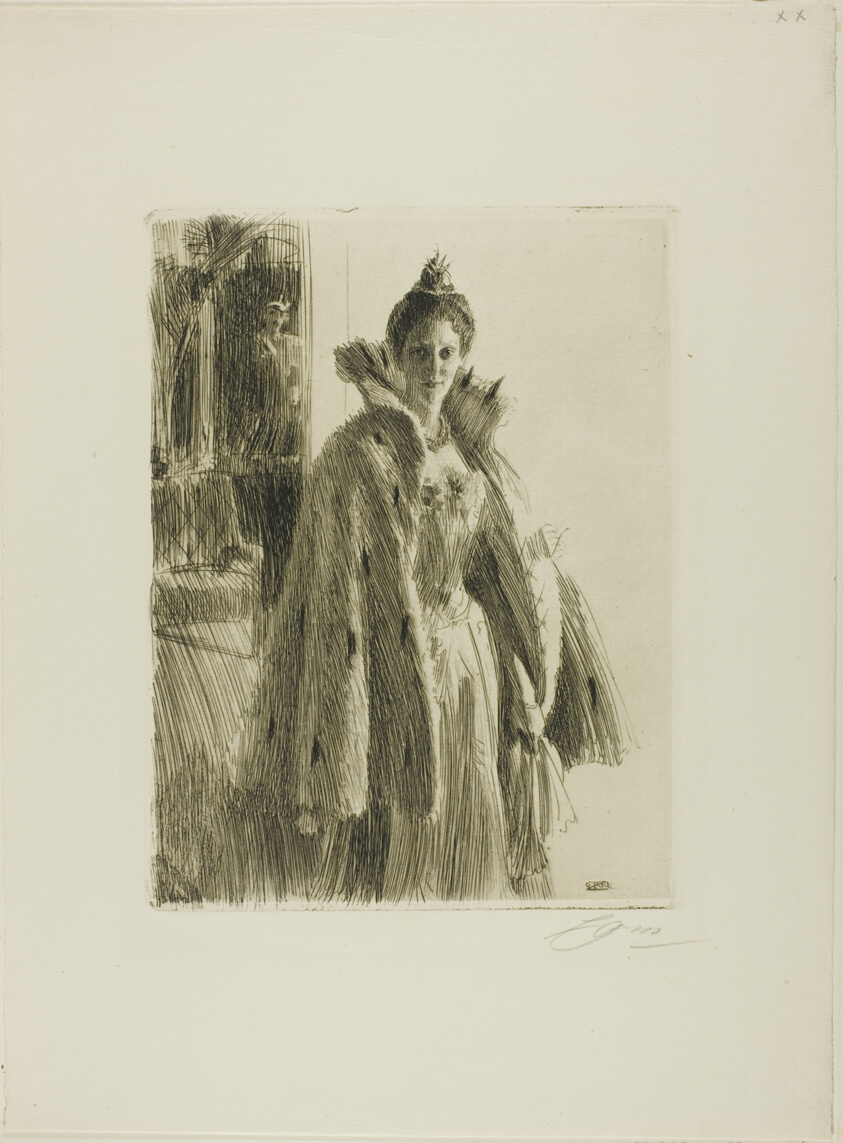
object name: Print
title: H. R. H. Princess Ingeborg of Sweden II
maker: Anders Zorn (Swedish, 1860-1920)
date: 1900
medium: Etching on ivory laid paper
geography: Sweden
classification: etching; print; prints and drawing